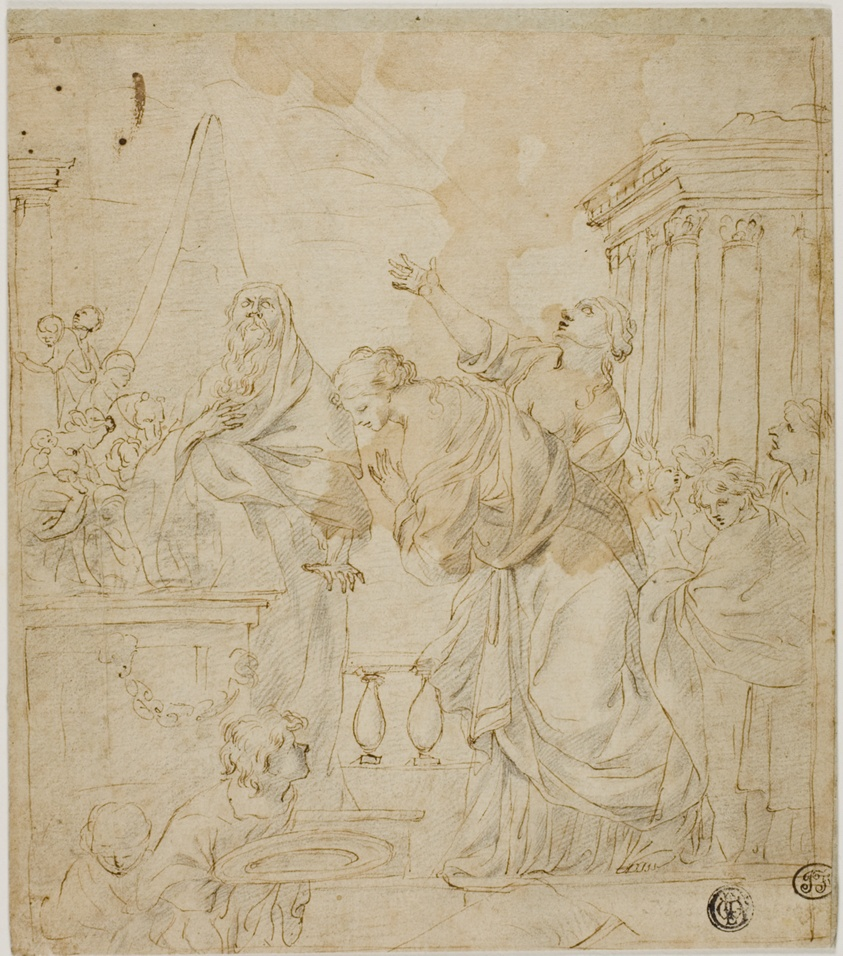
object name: Drawing and Watercolor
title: Sacrifice of Jephthah's Daughter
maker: After Sébastien Bourdon (French, 1616-1671); or Domenichino (Italian, 1581-1641)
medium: Pen and brown ink, over black chalk, on cream laid paper, laid down on gray laid paper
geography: Italy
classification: pen and ink drawings; paper; drawings (visual works); prints and drawing